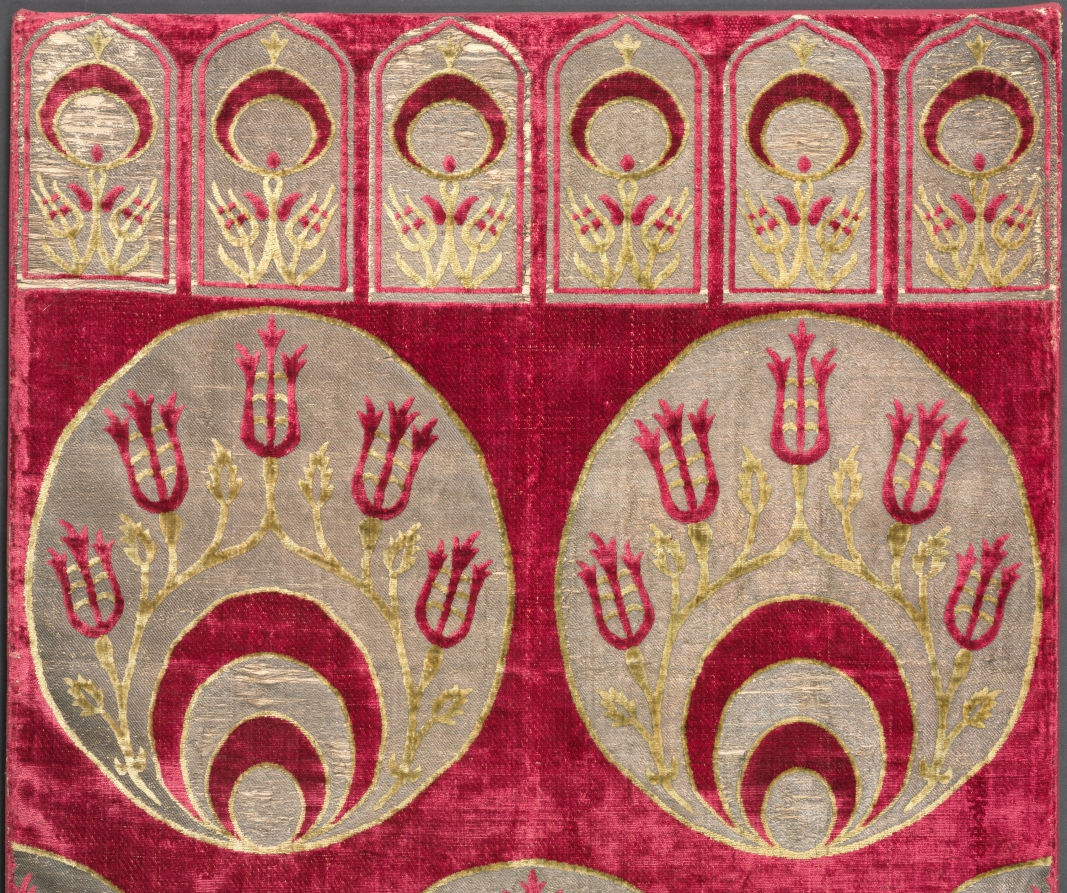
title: Brocaded velvet cushion cover with crescents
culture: Turkey, Istanbul or Bursa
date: 1525–75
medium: velvet, brocaded: silk, gilt- and silver-metal thread, and cotton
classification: Velvet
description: This cushion cover is one of the earliest and highest quality examples that has survived. The vibrant pattern displays large crescents inscribed with smaller crescents and elegant rosebuds on a leafy vine. The six-pointed lappet designs across each end identify its function as a cover for a cushion on a divan, the equivalent of a Western sofa. The elegant yet lively quality of the drawing, velvet weave, and dense metal thread indicate that it was made near the height of Ottoman silk textile production in the mid-1500s.